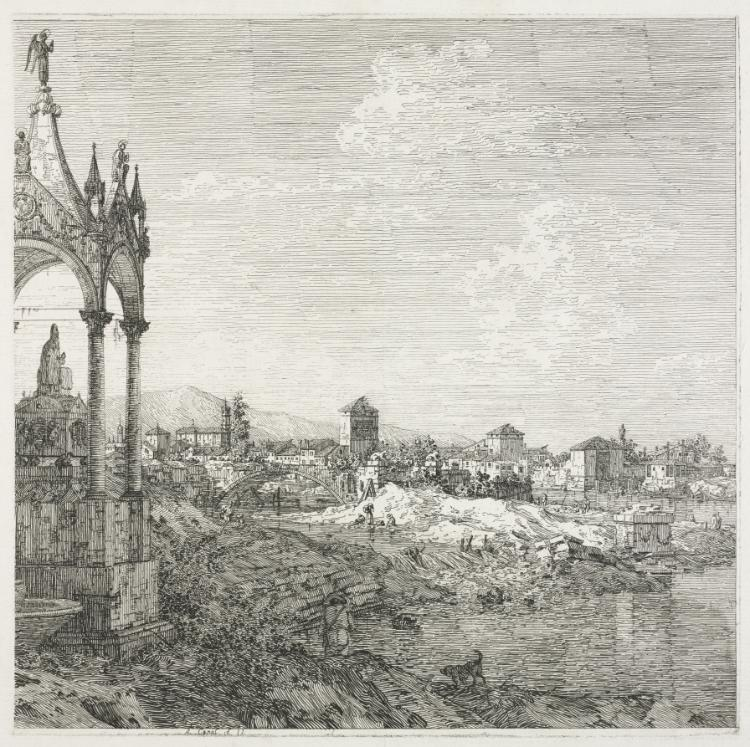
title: Views: The Sepulcher of a Bishop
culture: Italy, Venice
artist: Antonio Canaletto (Italian, 1697–1768)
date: 1735–1746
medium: etching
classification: Print